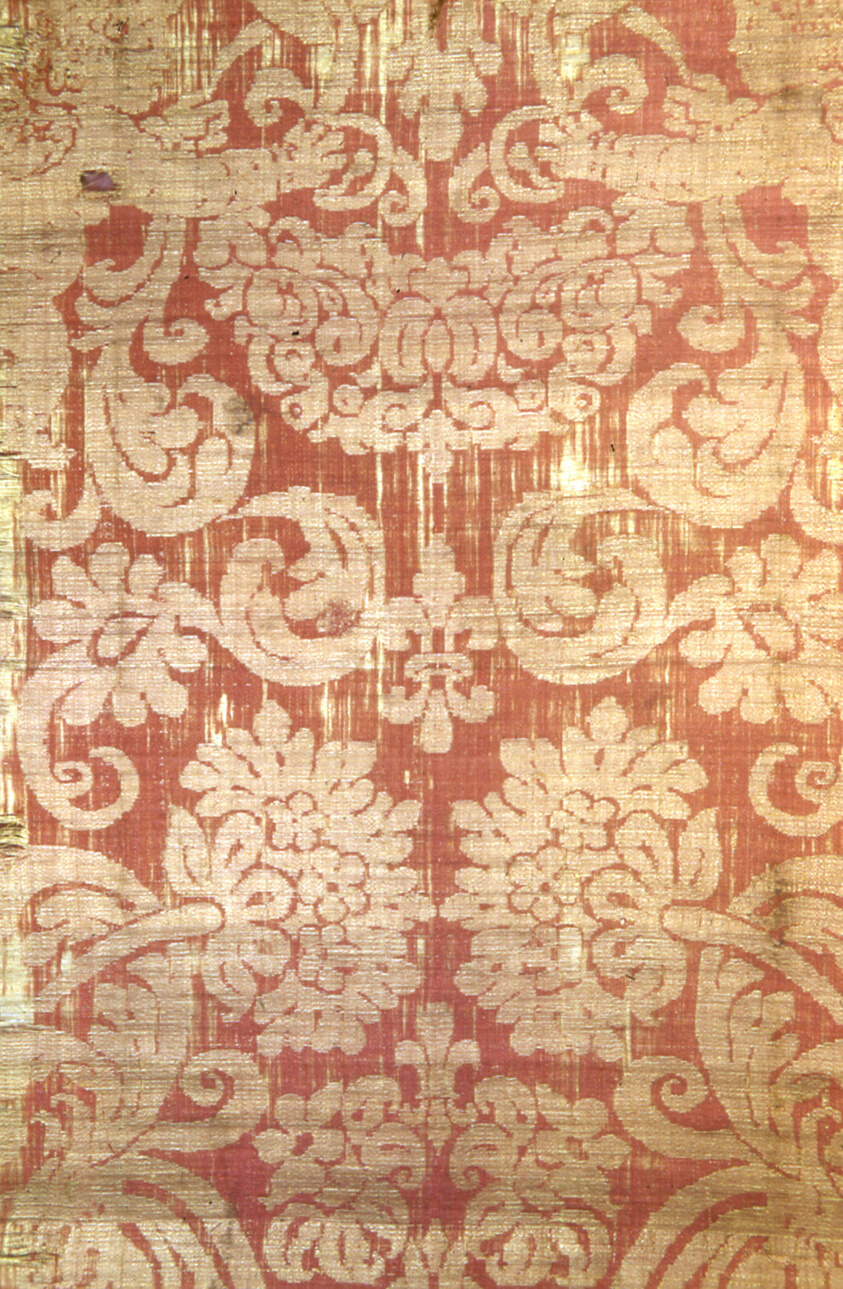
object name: Textile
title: Panel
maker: Italy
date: 16th/17th century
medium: Silk, 4:1 satin damask weave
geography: Italy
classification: textile; weaving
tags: flowers, animals, cupids, eagles, foliage